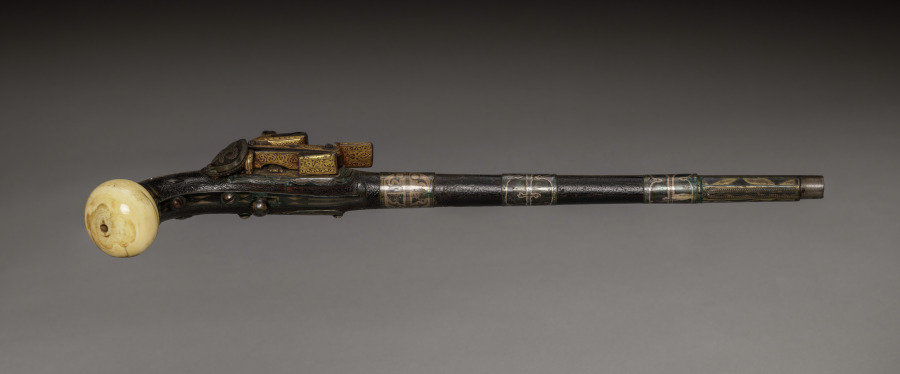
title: Ball-Butted Miquelet-Lock Pistol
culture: Causasus, Daghestan, 19th century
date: c. 1850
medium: steel, silver, gold inlay, leather, ivory ball butt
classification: Arms and Armor